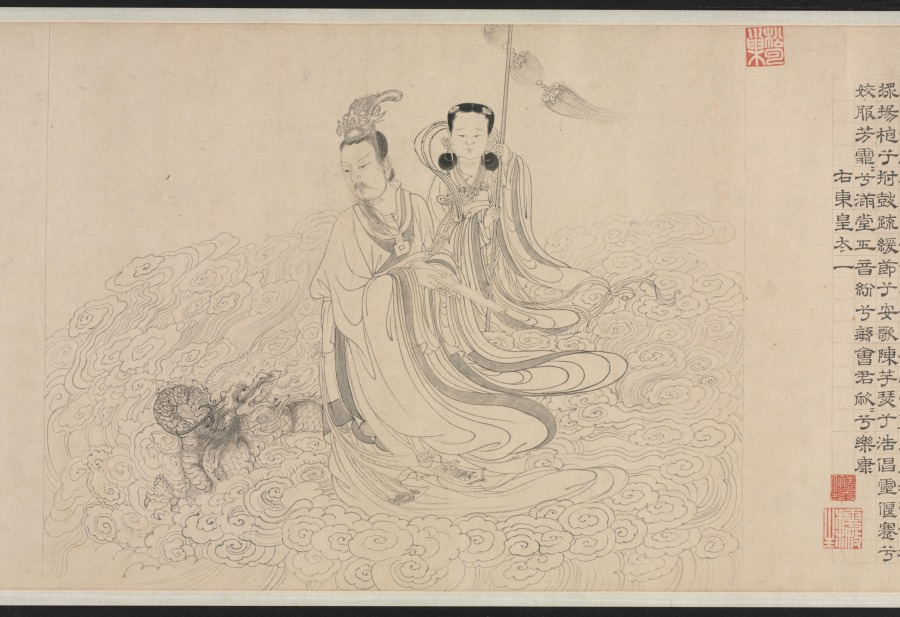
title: Nine Songs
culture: China, Yuan dynasty (1271-1368)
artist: Zhang Wo (Chinese, active c.1336–after 1364)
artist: Chu Huan (Chinese, active 1361)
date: 1361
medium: handscroll; ink on paper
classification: Painting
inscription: 7 colophons and 47 seals: 1 colophon, dated 1361, and 28 seals of Chu Huan 褚奐 (active c. 1361); 1 colophon, dated 1785, and 1 seal of Lu Shihua 陸時化 (1714-1779); 2 seals of Lu Yü-ch'ing (18th c.); 1 colophon, dated 1935, of Ye Gongchuo 葉恭綽 (1881-1968); 1 colophon, dated 1935, of Wu Hufan 吳湖帆(1894–1968); 1 colophon, dated 1938, and 1 seal of Wang Tongyu 王同愈 (1856-1941); 1 colophon, dated 1941, of Wu Huayuan 吳華源 (1893-1972); 1 colophon, dated 1942, and 9 seals of Xu Bangda 徐邦達 (1911–2012); 1 colophon, dated 1942, of Lang Jingshan 郎靜山 (1892-1995); 1 colophon, dated 1944, of Tang Yun 唐雲 (1910-1993); 6 seals of Wang Jiqian [C.C. Wang] 王季遷 (1907–2003).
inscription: Text of The Nine Songs written by Chu Huan at the end of each section.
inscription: 右離騷九歌圖，宋龍溟居士李公本，淮南張渥叔厚所畫妙絕當世。家藏請予書其辭目識于左。至正二十一年辛醜三月旦河南褚奐記。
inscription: Colophon by Lu Shihua 陸時化 (1714–1789): This scroll is fortunate to have been handed down from collections of the right people. Now, after 500 years, its condition is as good as when it was painted. I acquired this from Mr. Shen Guiyu [1673-1769], the President of the Board of Rites. The label is in his handwriting when he was 95 years old. I submit that Chu Huan (t. Shiwen) of the Yuan Dynasty was a native of Qiantang. His "seal" and li writings are in the style of Wu Rui. For example, in [Chu Kuei's] Ming ji lu [A list of masterpieces] is recorded the stele commemorating the restoration of the prefectural school of Kun-shan, the text of which was composed by Yang Weizhen in the twenty-first year of Zhizheng [1361]; and the calligraphy as well as the title in li style was by Chu Huan, who was at that time an assistant judge of the prefecture of Haining in the circuit of Hangzhou. Zhang Wo's zi is Shuhou (叔厚). His literary name is Zhen Qisheng (贞期生). According to [Gu Ying's] Yu shan cao tang ya jii, he liked to paint in the bai-miao or the "pure delineation" style after the method of Li Longmian [Li Gonglin 李公麟], which finds no peer among the ancient masters. This is agreed upon [by Pei Ch'iung] in his Qing jiang zhi who praised [Zhang Wo] as being quite learned and well-versed in many branches of the arts, especially figure painting. Recorded by Lu Shihua [The mountain dweller], listening to the pine, in the twelfth month of the yisi year [1785].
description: Painted in the baimiao, or fine-line drawing style, this ancient work demonstrates the literati’s use of abstract calligraphic brushwork for self-expression. The subject of the “Nine Songs”—songs associated with shamanistic rituals in the ancient Chu kingdom—had traditionally provided artists with myths and legends that they could explore and reinterpret in their own works.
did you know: Divided into eleven sections, the scroll contains illustrations by painter Zhang Wu followed by a transcription of the relevant verse by calligrapher Chu Huan.